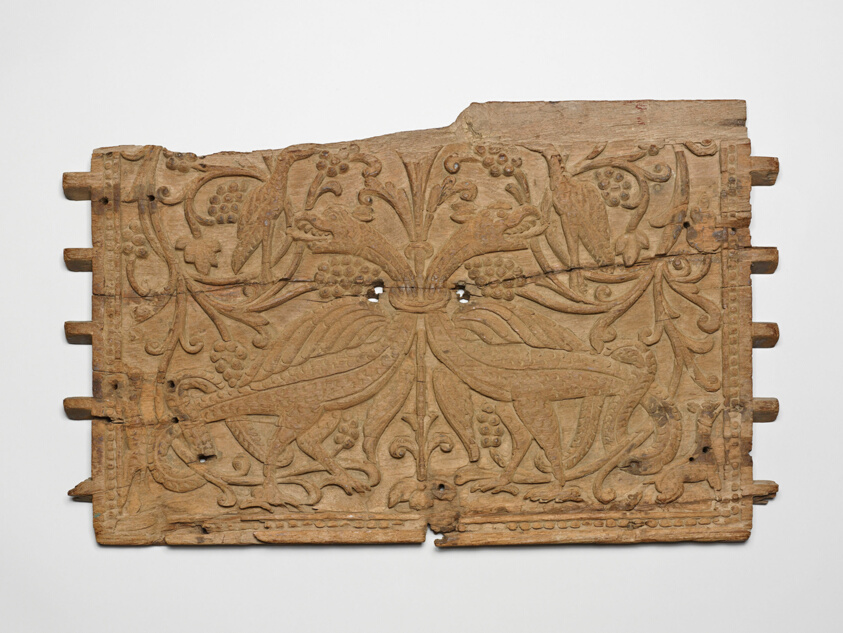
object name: Architectural fragment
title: Carved Panel with Mythical Birds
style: South Asian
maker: India; Deccan or Portuguese Goa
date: Late 16th century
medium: Wood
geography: Deccan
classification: wood; sculpture; asian art; architectural fragment